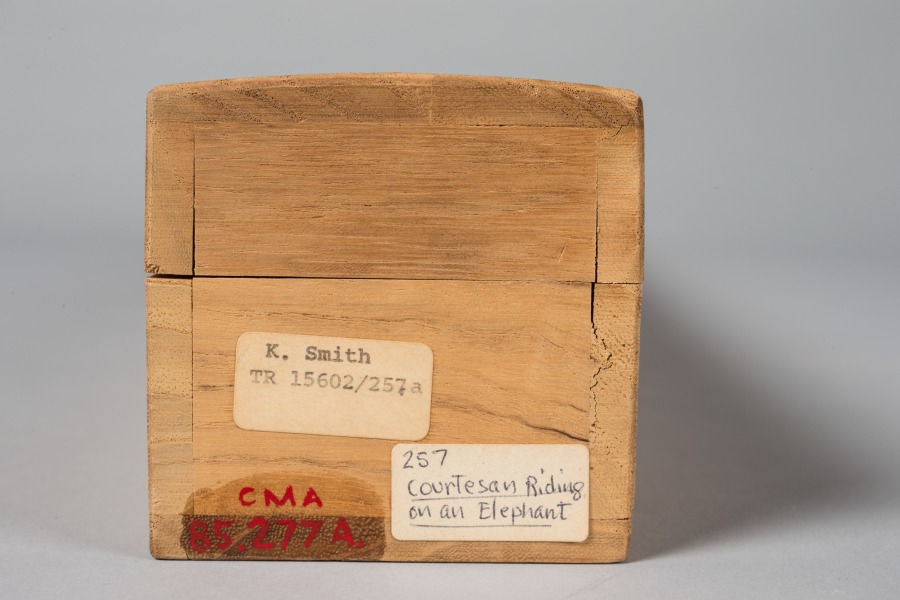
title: Stand-in Fugen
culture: Japan, Edo period (1615–1868)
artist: Kitao Masayoshi (Japanese, 1761–1824)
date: late 1700s–early 1800s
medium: hanging scroll; ink and color on silk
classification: Painting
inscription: artist's signature and two seals, lower right.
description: Here, a woman dressed as a man replaces Fugen, a bodhisattva—a being among those considered enlightened in Buddhism—who symbolizes learning as a path to awakening and typically rides an elephant. The painting teaches the lesson of impermanence through the petals falling from the lotus flower the woman holds. It also alludes to the legend of Eguchi, a 12th-century courtesan who, following an encounter with a Buddhist monk-poet called Saigyō, revealed herself to be a manifestation of Fugen.